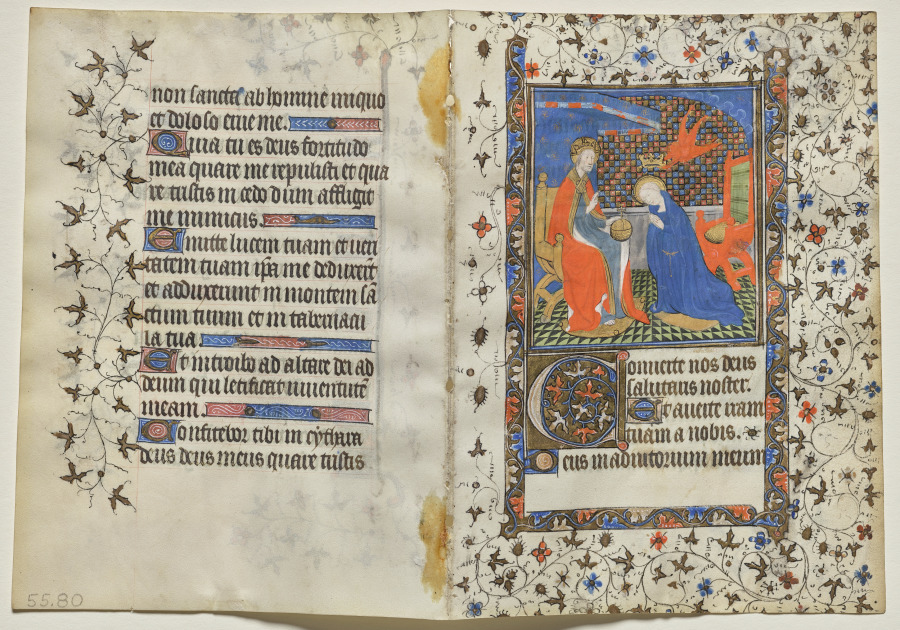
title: Bifolio from a Book of Hours: Coronation of the Virgin (recto)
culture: France, Paris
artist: workshop of Boucicaut Master (French, Paris, active about 1410–25)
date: c. 1415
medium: ink, tempera, and gold on vellum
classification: Manuscript